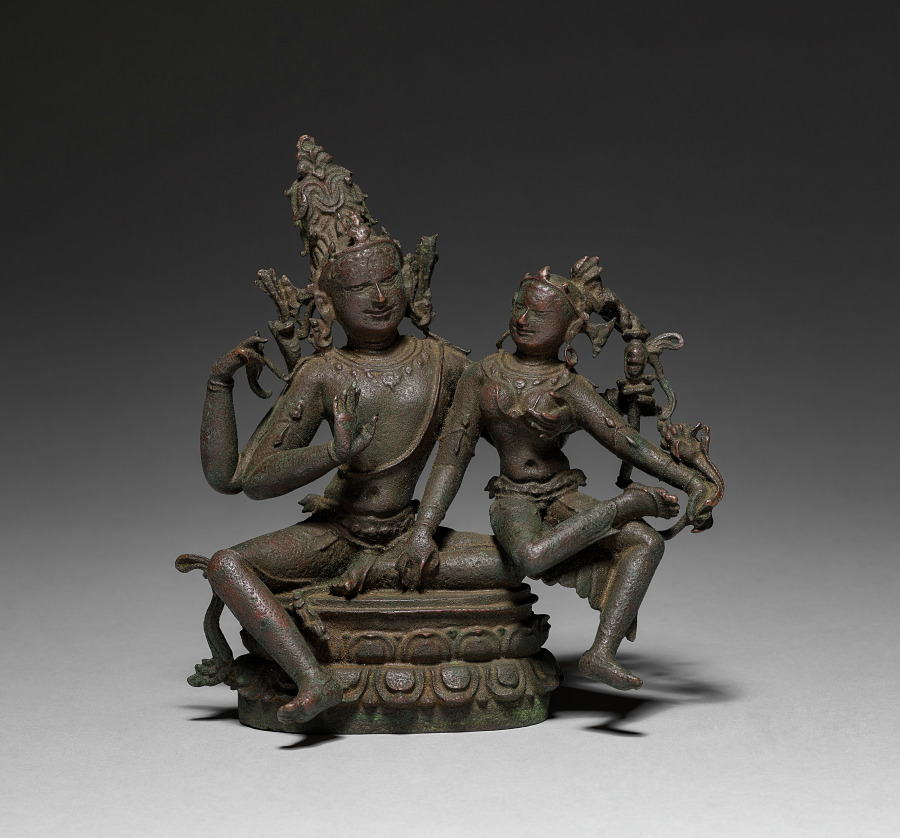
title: Shiva and Parvati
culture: East India, Bengal, Pala period, 9th Century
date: 800s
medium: bronze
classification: Sculpture